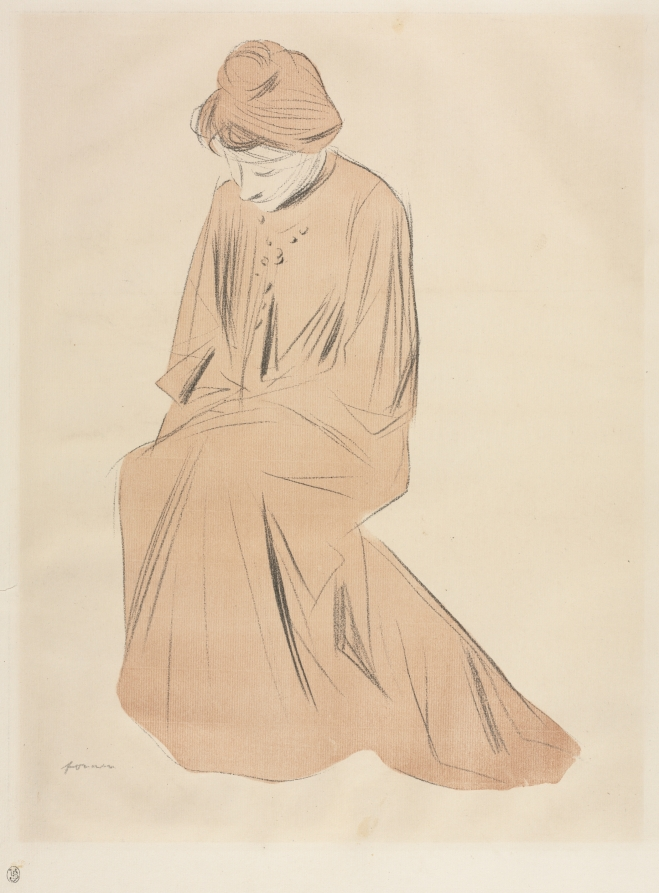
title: Study of a Seated Woman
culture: France, late 19th-early 20th century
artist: Jean Louis Forain (French, 1852–1931)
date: late 1800s–early 1900s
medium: lithograph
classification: Print